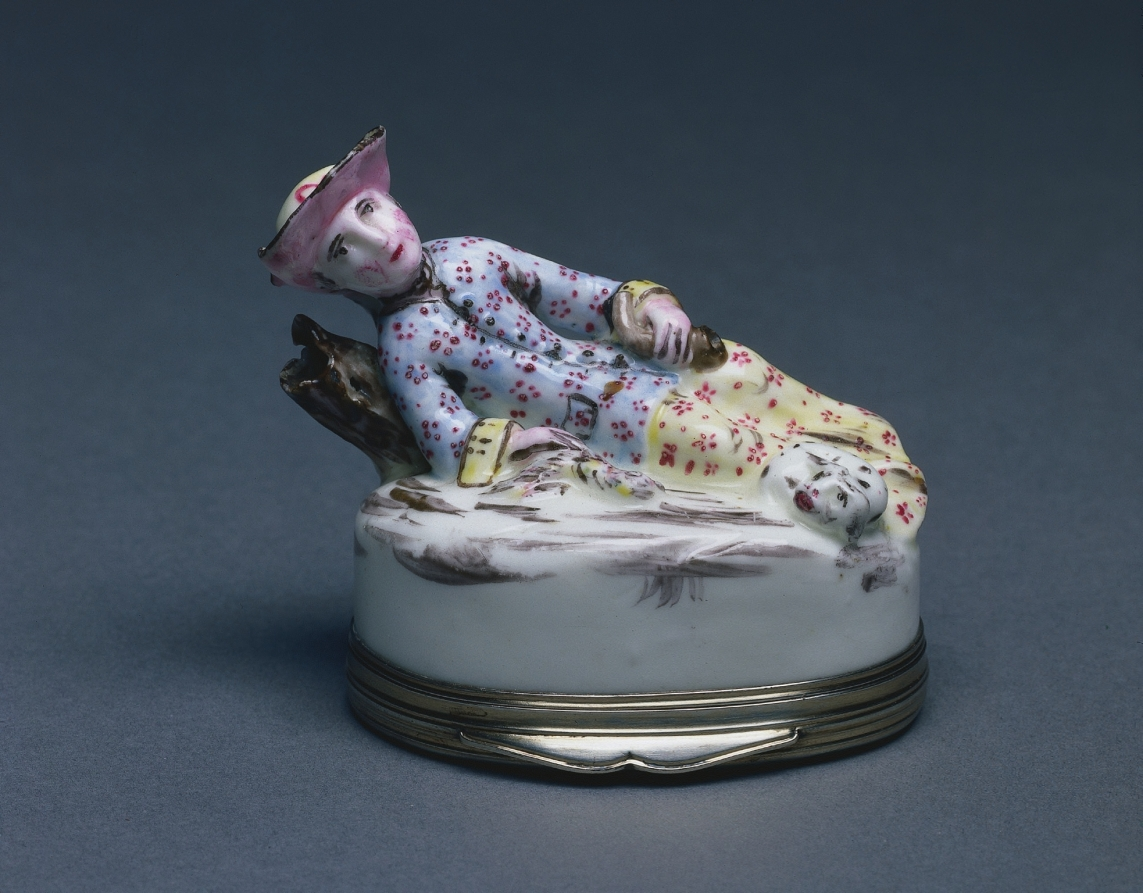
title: Box with Reclining Huntress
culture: France, Mennecy, 18th century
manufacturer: Mennecy Factory (French)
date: c. 1753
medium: soft-paste porcelain mounted in silver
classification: Ceramic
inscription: porcelain unmarked